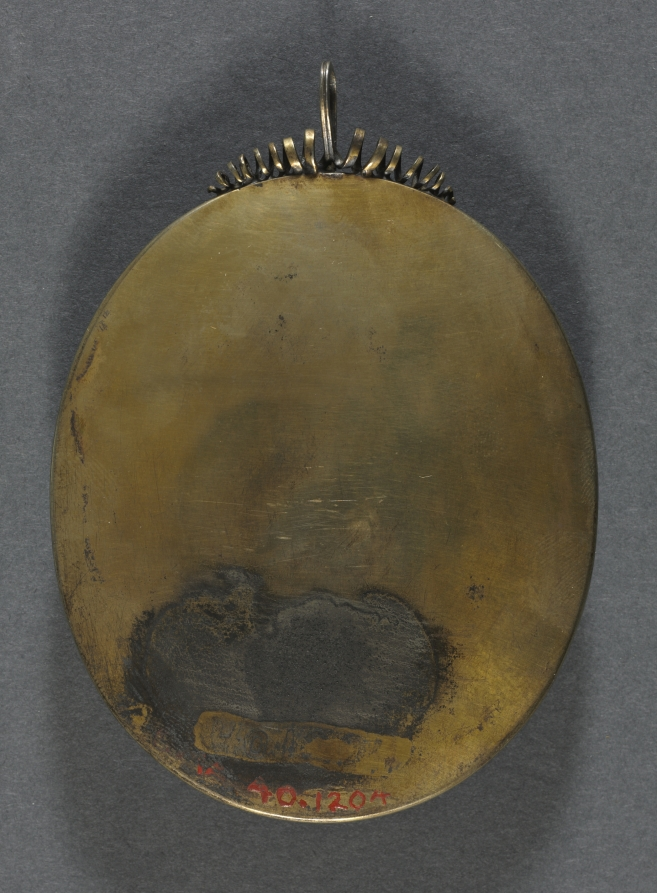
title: Portrait of a Woman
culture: England, 17th century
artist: Samuel Cooper (British, 1608/09–1672)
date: 1646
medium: watercolor on vellum with gold border in a silver gilt frame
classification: Portrait Miniature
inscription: signed right: S.C. / 1646.